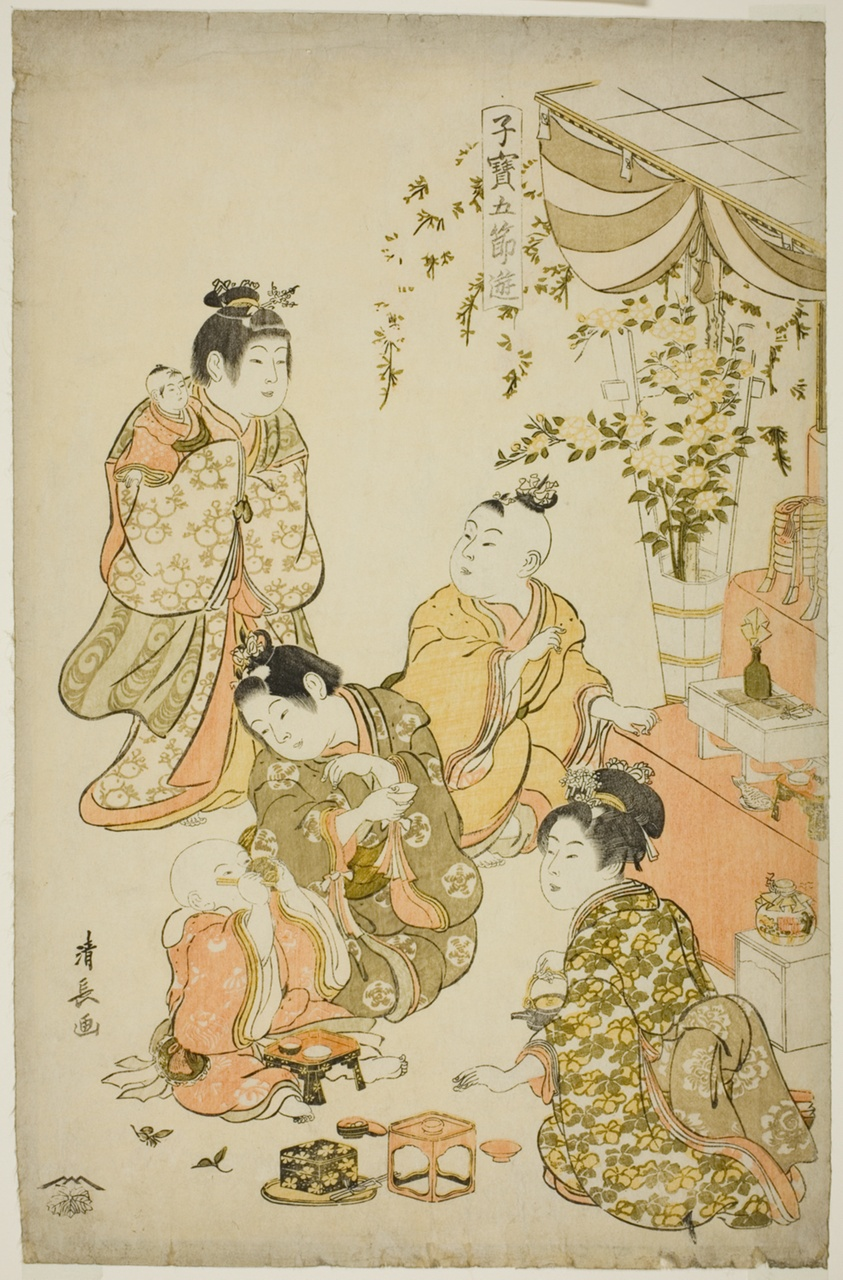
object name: Print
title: The Doll Festival, from the series "Precious Children's Games of the Five Festivals (Kodakara gosetsu asobi)"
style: Japanese (culture or style)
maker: Torii Kiyonaga (Japanese, 1752-1815)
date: c. 1801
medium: Color woodblock print; oban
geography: Japan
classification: woodblock print; print; asian art